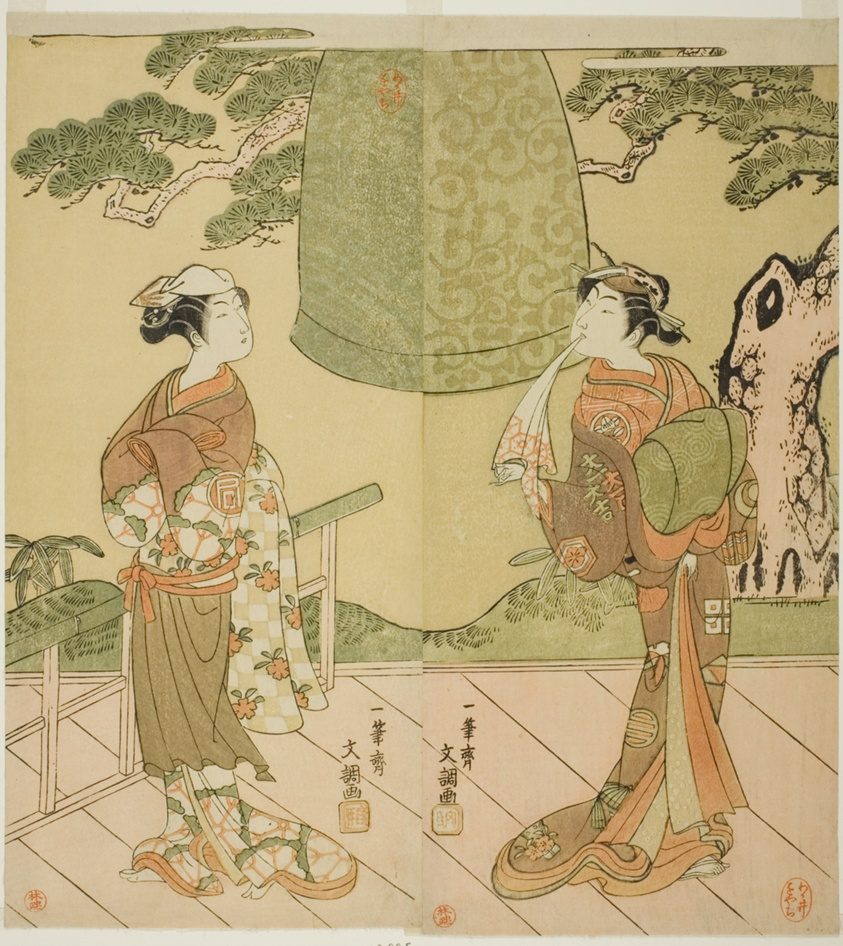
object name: Print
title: The Actors Ichimura Uzaemon IX as Shume no Hangan Morihisa (right), and Sanogawa Ichimatsu II as Chujo (left), in the Play Edo no Hana Wakayagi Soga, Performed at the Ichimura Theater in the Second Month, 1769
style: Japanese (culture or style)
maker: Ippitsusai Buncho (Japanese, active c. 1755-90)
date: c. 1769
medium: Color woodblock print; hosoban; center and left sheets of triptych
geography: Japan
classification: woodblock print; print; asian art